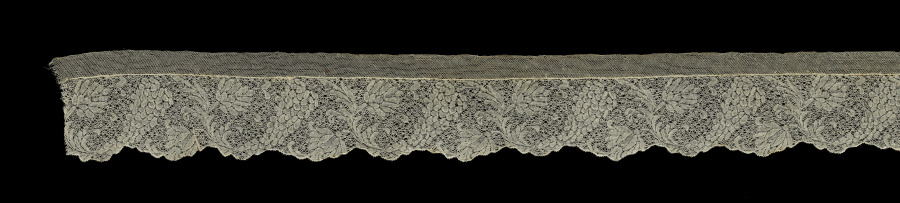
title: Lace Edging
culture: Belgium, Binche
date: 1700s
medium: Linen: bobbin lace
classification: Lace